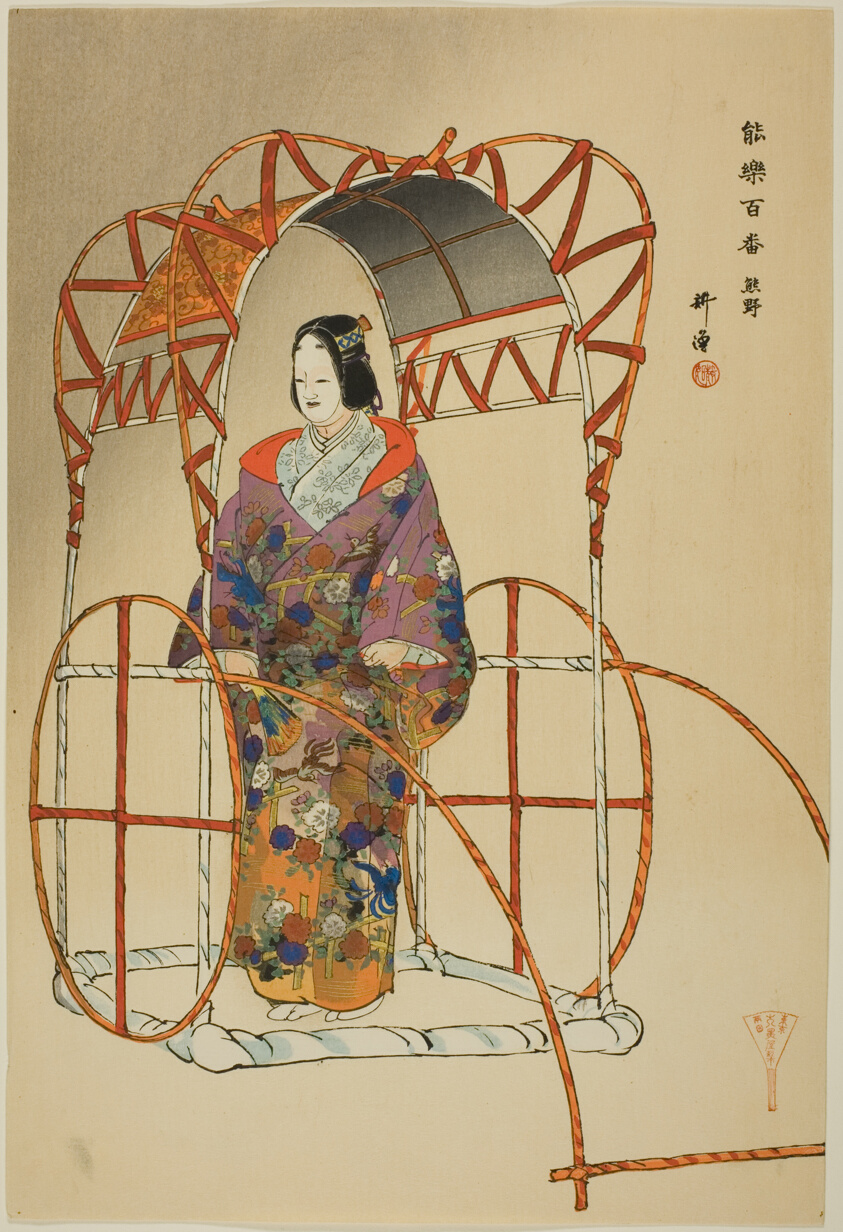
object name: Print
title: Yu-ya, from the series "One Hundred No Dramas (Nogaku hyakuban)"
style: Japanese (culture or style)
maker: Tsukioka Kogyo; Japanese, 1869-1927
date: 1898/1903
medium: Color woodblock print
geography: Japan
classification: woodblock print; print; asian art